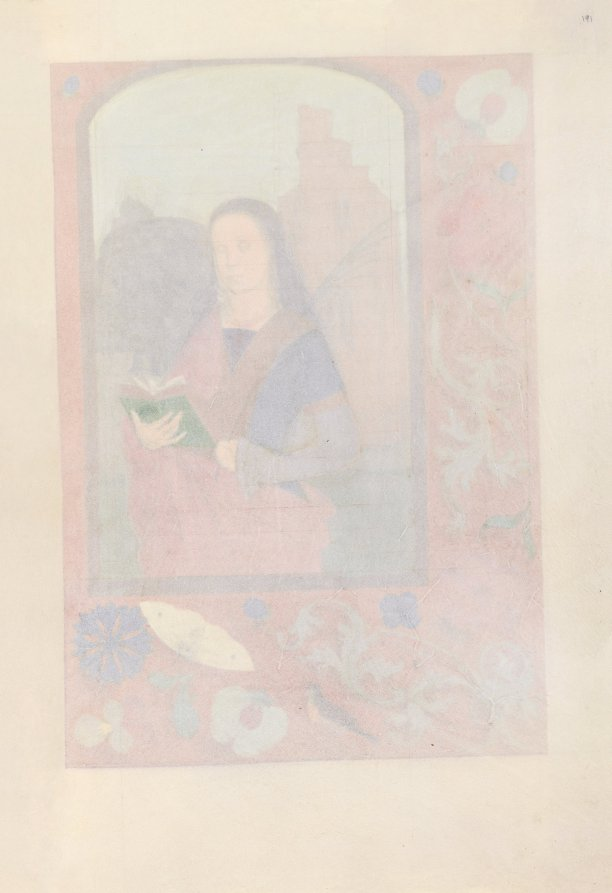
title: Hours of Queen Isabella the Catholic, Queen of Spain: Fol. 191r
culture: Flanders, Ghent and Bruges, late 15th century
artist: Master of the First Prayerbook of Maximillian (Flemish, c. 1444–1519)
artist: and Associates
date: c. 1500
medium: ink, tempera, and gold on vellum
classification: Bound Volume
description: This manuscript was illuminated by a circle of at least five highly organized manuscript painters active in the Flemish cities of Ghent and Bruges. The principal illuminator was Alexander Bening, who painted the majority of the book's miniatures. Manuscripts produced by this circle of artists are renowned for the decoration of their borders, which typically feature a rich variety of realistically-painted flowers, birds, and butterflies. This prayer book, called a book of hours, was intended not for a cleric, but for the private devotions of a lay person-in this case, Isabella the Catholic, Queen of Spain (1451-1504). Isabella's coat of arms embellishes the book's frontispiece. It is unlikely that the book was commissioned by the Queen herself; rather, she probably received it as a diplomatic gift from someone courting her patronage, perhaps Cardinal Francisco Jimenez de Cisneros. A Franciscan friar, Jimenez was dependent upon Isabella for his advancement, first to the post of Queen's confessor in 1492, and then to Archbishop of Toledo in 1495.